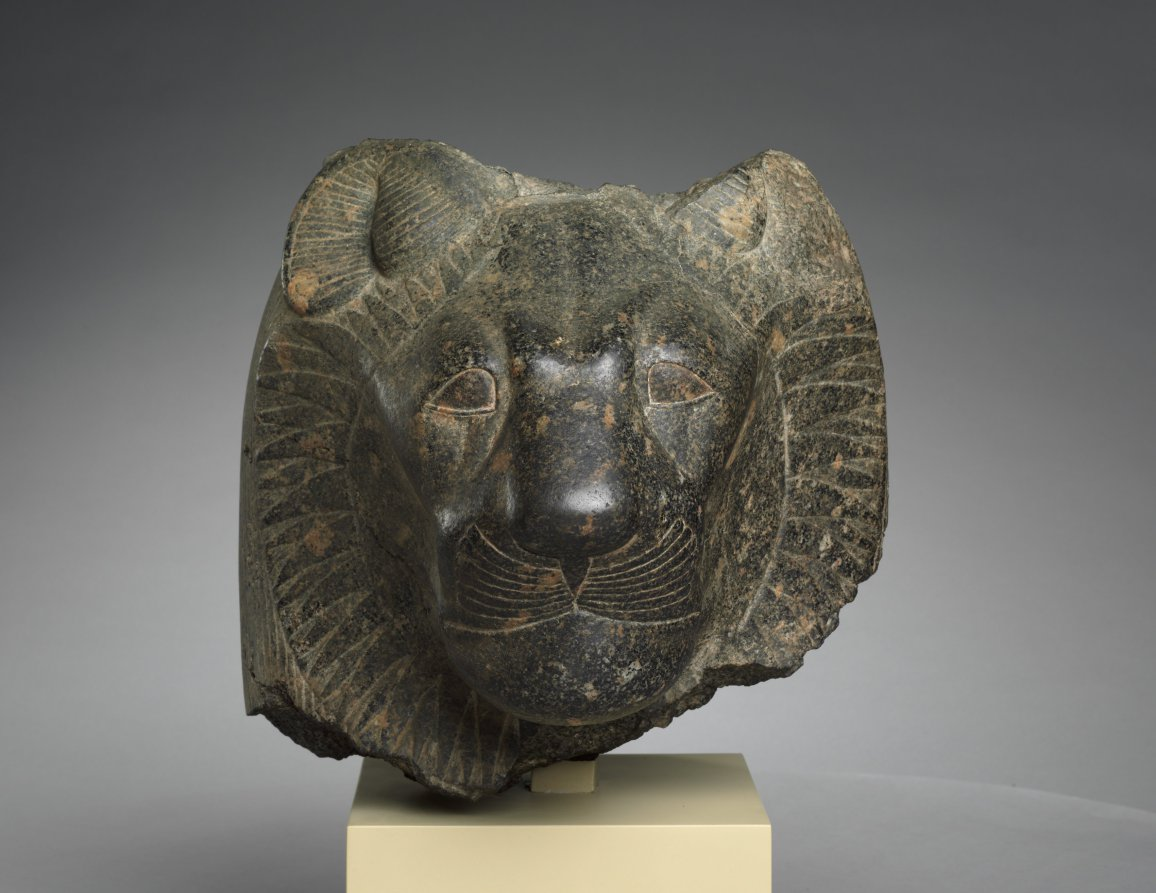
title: Head of Sekhmet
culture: Egypt, Thebes(?), New Kingdom (1540–1069 BCE), Dynasty 18, reign of Amenhotep III (1390–1352 BCE)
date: c. 1391–1353 BCE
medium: granodiorite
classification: Sculpture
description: This lioness head once belonged to a grand statue of the goddess Sekhmet, "the powerful one," probably seated and wearing a tight dress. Possibly appealing to her healing aspect, Pharaoh Amenhotep III, often described as “beloved of Sekhmet,” commissioned and dedicated hundreds of large granodiorite Sekhmet sculptures in his Theban mortuary temple. Thus, this head likely comes from Thebes, perhaps later moved across the Nile—like many such sculptures—to the temple of Mut, a related deity, at Karnak. Behind her stylized ruff, Sekhmet wears a wig, once crowned with a sun disk and uraeus, the stylized cobra symbolizing royal or divine power.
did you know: Amenhotep III may have dedicated 730 statues of Sekhmet, two for each day of the year.